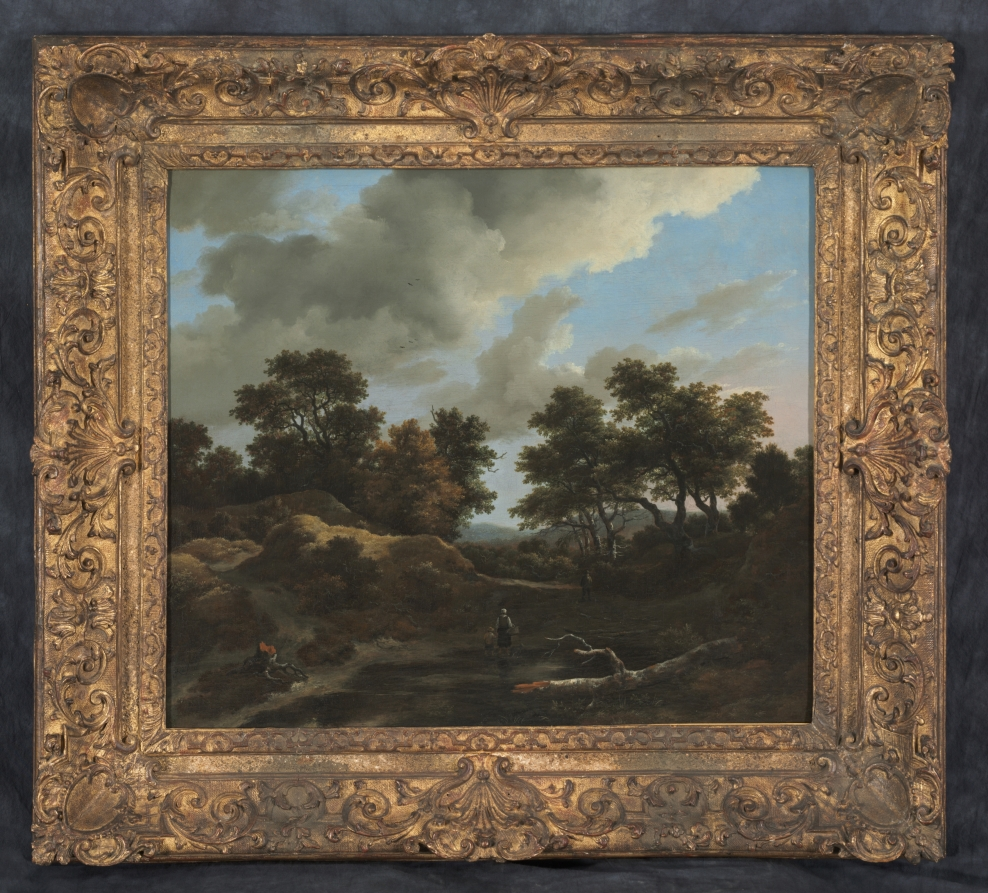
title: Wooded and Hilly Landscape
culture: Netherlands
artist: Jacob van Ruisdael (Dutch, 1628/29–1682)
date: 1660s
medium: oil on canvas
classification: Painting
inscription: Signed lower left: "JvRuisdael [JvR in monogram]"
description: Jacob van Ruisdael, one of the most eminent Dutch landscape painters, is revered for his brooding woodland compositions. With much of this painting's composition dedicated to nature alone, an underlying sense of sublimity is heightened by Ruisdael through the inclusion of several diminutive figures. A mother and child trudge through a weathered path in the foreground, their pet dog following closely at their side, while a lone traveler approaches from the foliage ahead of them. This work is an excellent representation of the artist's later period, speaking to both his preoccupation with meticulous detail and the transitory relationship between humans and nature.